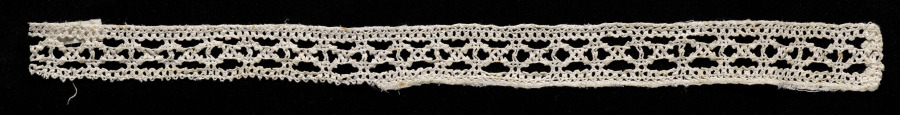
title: Lace Insertion (with selvage)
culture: Italy, Venice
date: 1540–60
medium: Bobbin lace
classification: Lace